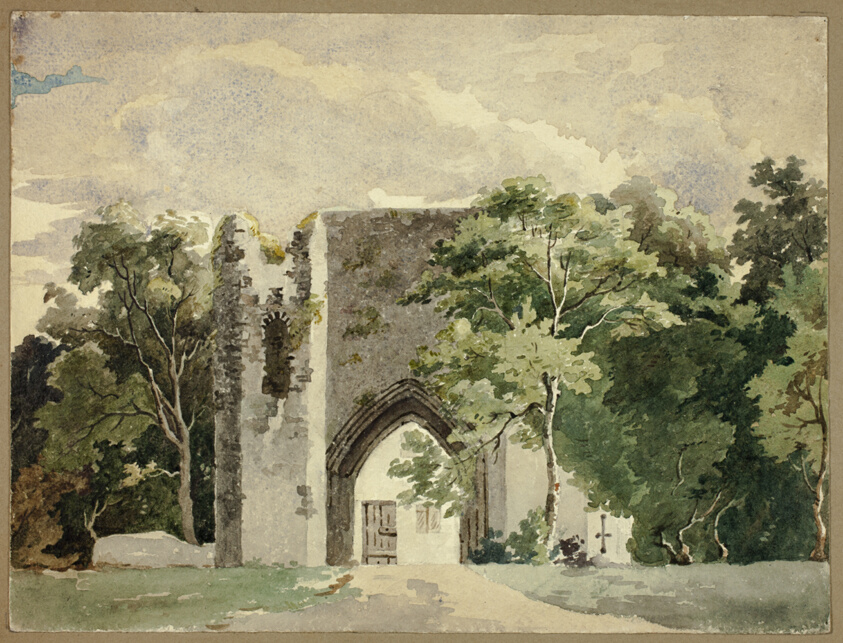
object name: Drawing and Watercolor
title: Abbey Ruin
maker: Samuel William Reynolds, the elder (English, 1773-1835)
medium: Watercolor, over traces of graphite, on ivory wove paper, laid down on brown-toned board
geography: England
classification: watercolor; drawings (visual works); prints and drawing